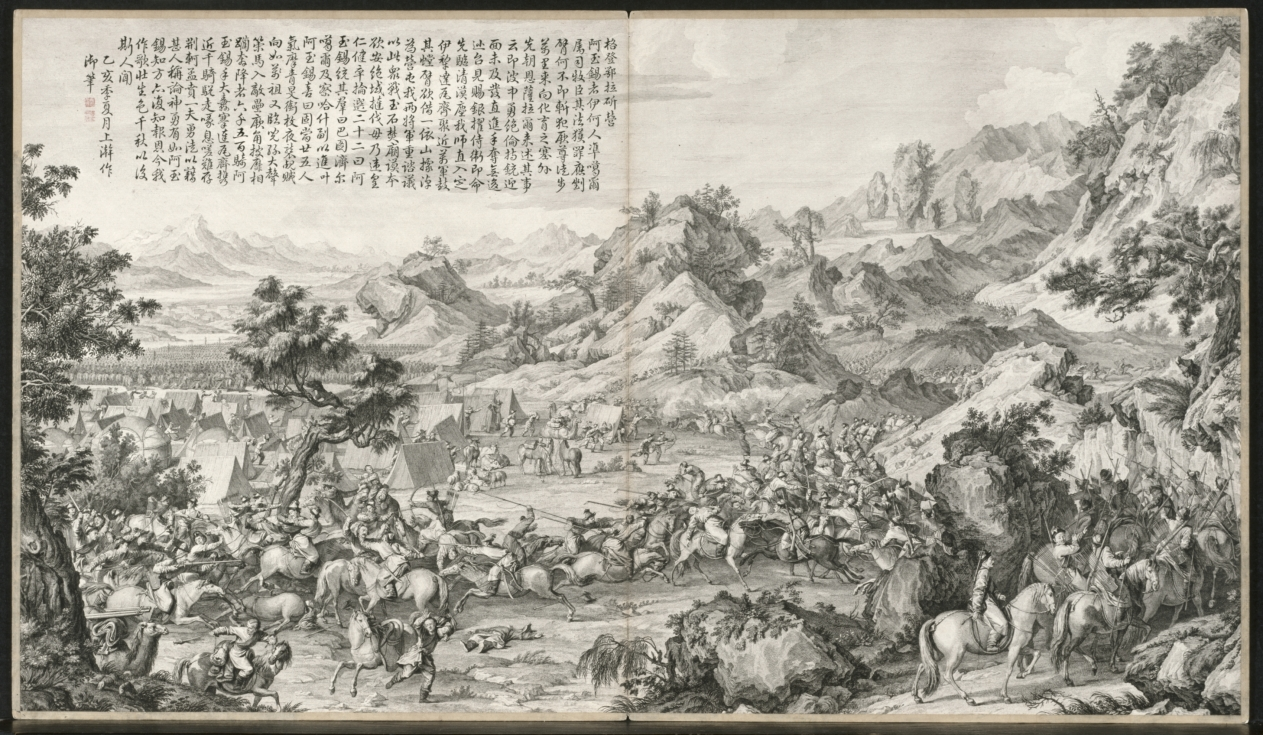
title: Attacking the Camp at Gatan Ola: from Battle Scenes of the Quelling of Rebellions in the Western Region, with Imperial Poems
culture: China, Qing dynasty (1644–1911), Qianlong reign (1736–95)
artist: Giuseppe Castiglione (Italian, 1688–1766)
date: c. 1765–74; poem dated 1755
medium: etching, mounted in album form, 16 leaves plus two additional leaves of inscriptions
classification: Print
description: This set of etchings was commissioned by Emperor Qianlong to record in pictorial terms the courage of his generals and soldiers in quelling the rebellions in the Western Regions. Qianlong added his own poem to each of the etchings, indicating his appreciation and pride in this demonstration of military might. "Western Regions" refers to the present-day Xingjiang province, often described in Western writing as "Central Asia."